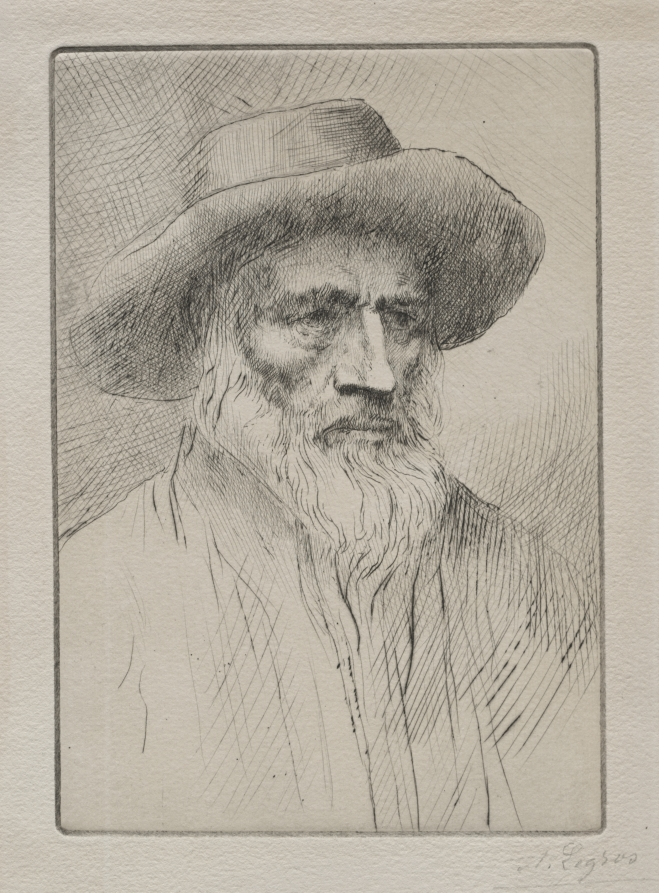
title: Paysan des Vosges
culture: France, 19th-20th century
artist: Alphonse Legros (French, 1837–1911)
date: c. 1857–1911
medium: etching and drypoint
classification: Print